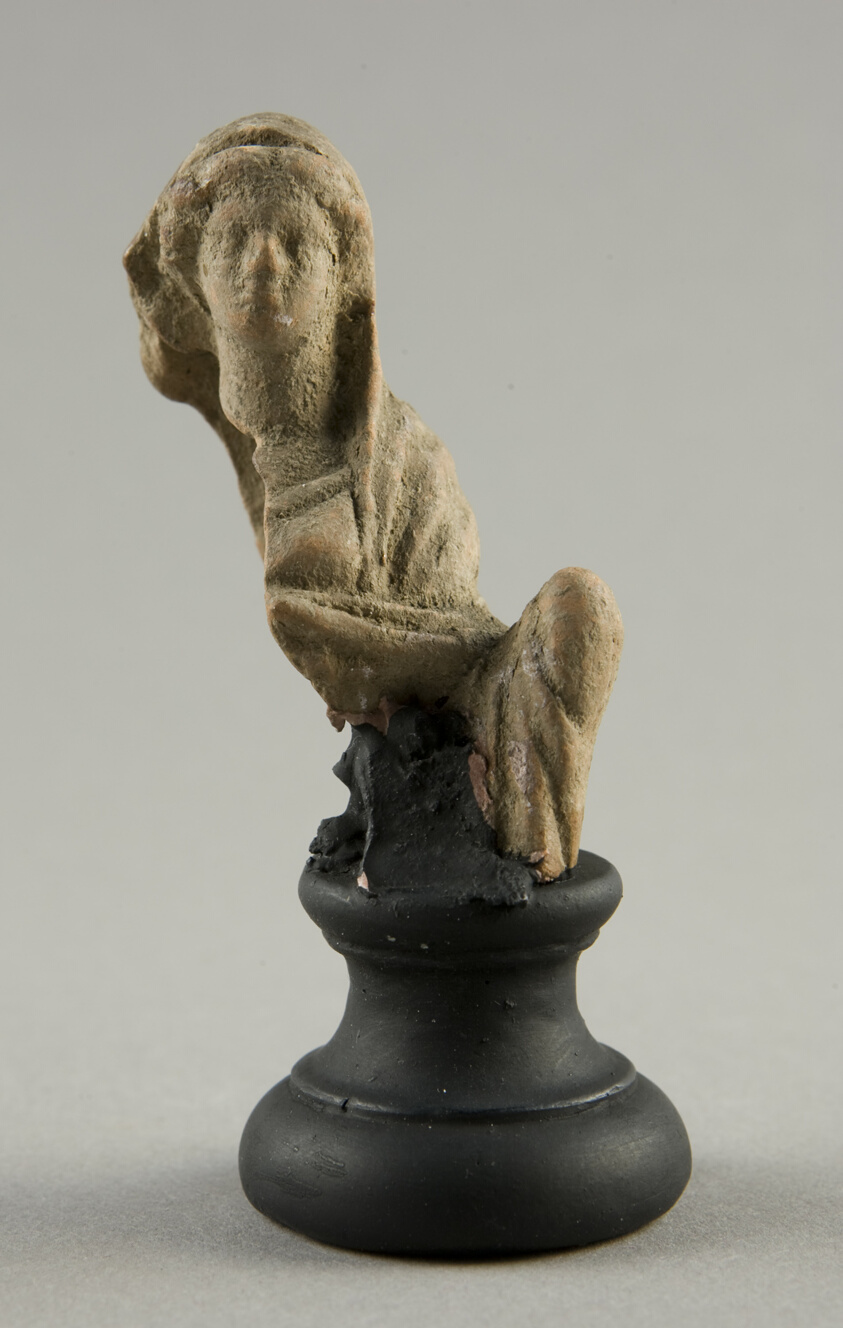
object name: Sculpture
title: Head and Left Side of Woman, Probably Seated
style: greek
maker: Greek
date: 4th-3rd century BCE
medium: terracotta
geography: Greece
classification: earthenware; ceramics; sculpture; ancient art